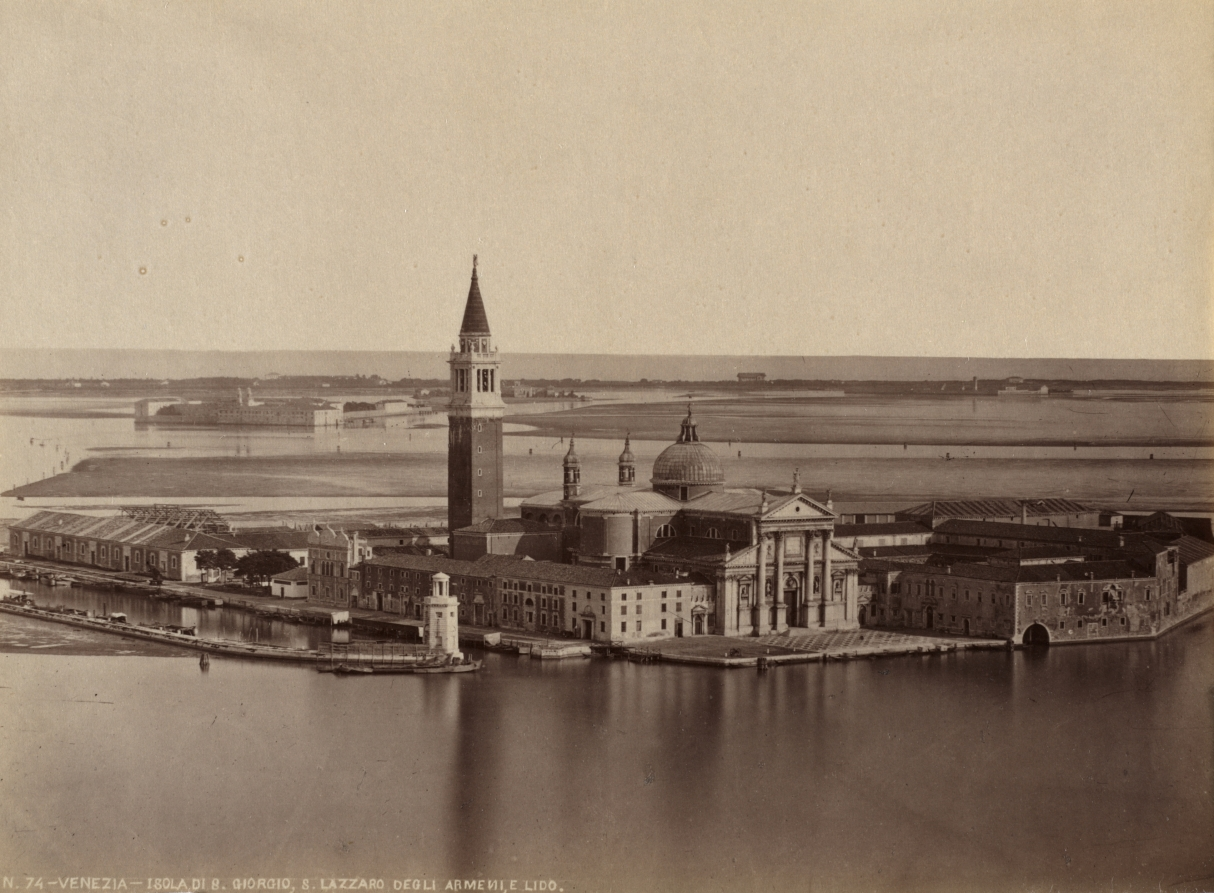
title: Venice - Island of San Giorgio, San Lazzaro degli Armeni, the Lido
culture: Italy, Venice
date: late 1800s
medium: albumen print from wet collodion negative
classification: Photograph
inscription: Titled on negative: "N.74-Venezia-Isola di S. Giorgio, S. Lazzaro degli Armeni, E. Lido"